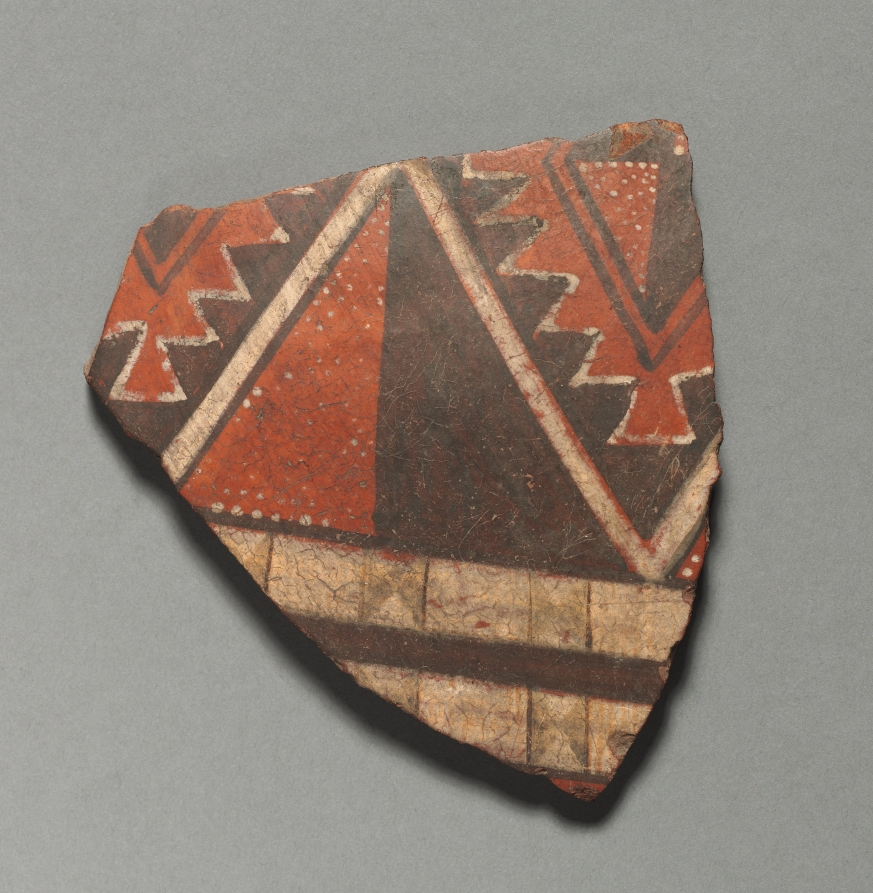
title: Fragment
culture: Peru, Inka, 1400-1532 AD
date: 1400–1532 AD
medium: pottery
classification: Ceramic